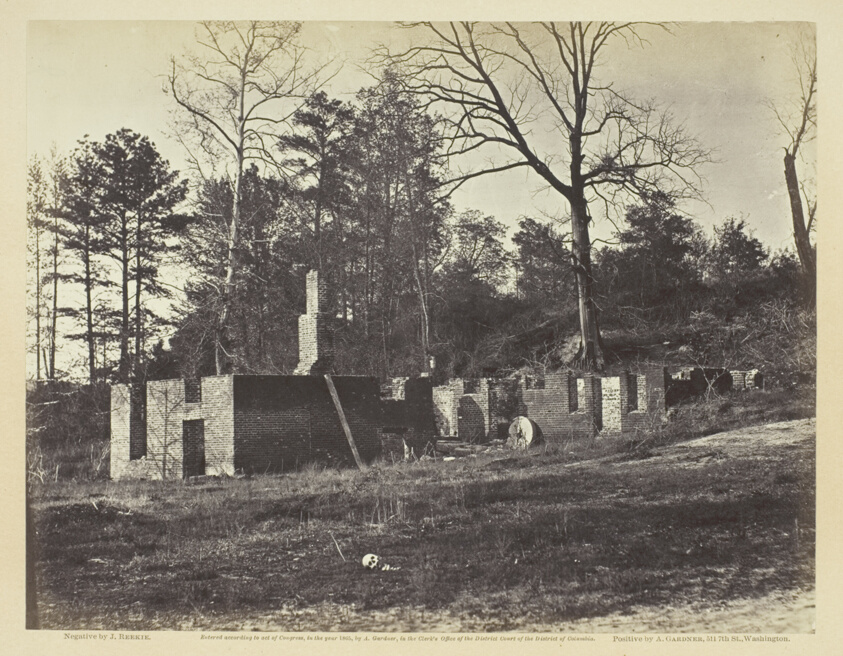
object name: Photograph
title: Ruins of Gains' Mill, Virginia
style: 19th century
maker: John Reekie (American, active 1861–1865)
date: April 1865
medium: Albumen print, pl. 93 from the album "Gardner's Photographic Sketch Book of the War, Volume II" (1866)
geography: United States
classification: albumen silver print; photographic process; photography; photograph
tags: Collected by Hugh Edwards, Gardner's Photographic Sketch Book